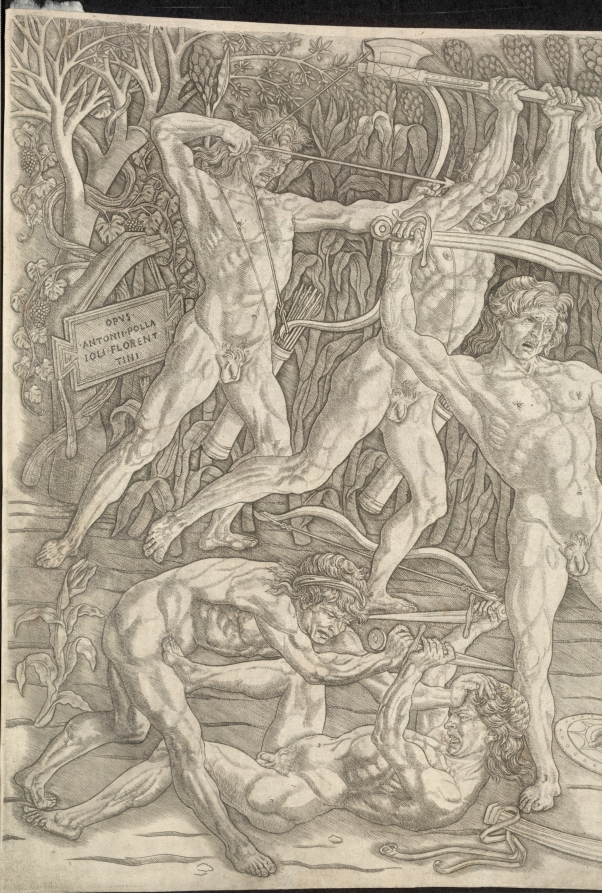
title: Battle of the Nudes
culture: Italy, 15th century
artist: Antonio del Pollaiuolo (Italian, 1431/32–1498)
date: 1470s–80s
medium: engraving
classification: Print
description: This engraving is one of the earliest Renaissance prints to portray the nude male body in action. Antonio del Pollaiuolo’s grimacing warriors appear like clones in different poses. The print may have functioned as a model for workshop apprentices studying human anatomy while learning to draw; however, the artist’s Latin signature suggests it also had an audience educated in literature. Art historians remain uncertain whether Pollaiuolo intended to depict a particular story or historical event. It is possible he created a deliberately ambiguous allegory that would appeal to patrons interested in interpreting symbols. For example, the continuous chain shared by the two central men could refer to an ancient idea that the body is the chain of the soul, only to be released in death.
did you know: Considered a groundbreaking work in the history of the Italian Renaissance, the CMA holds the only known impression of the print's first state.